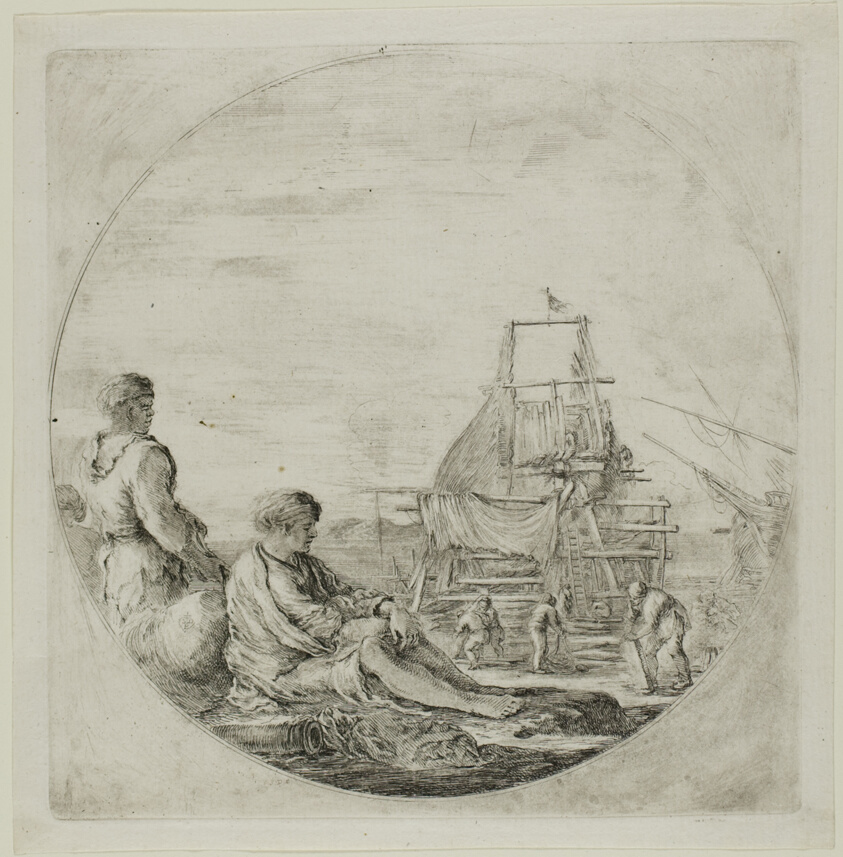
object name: Print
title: Shipyard with Two Sailors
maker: Stefano della Bella (Italian, 1610-1664)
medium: Etching on paper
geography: Italy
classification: etching; print; prints and drawing